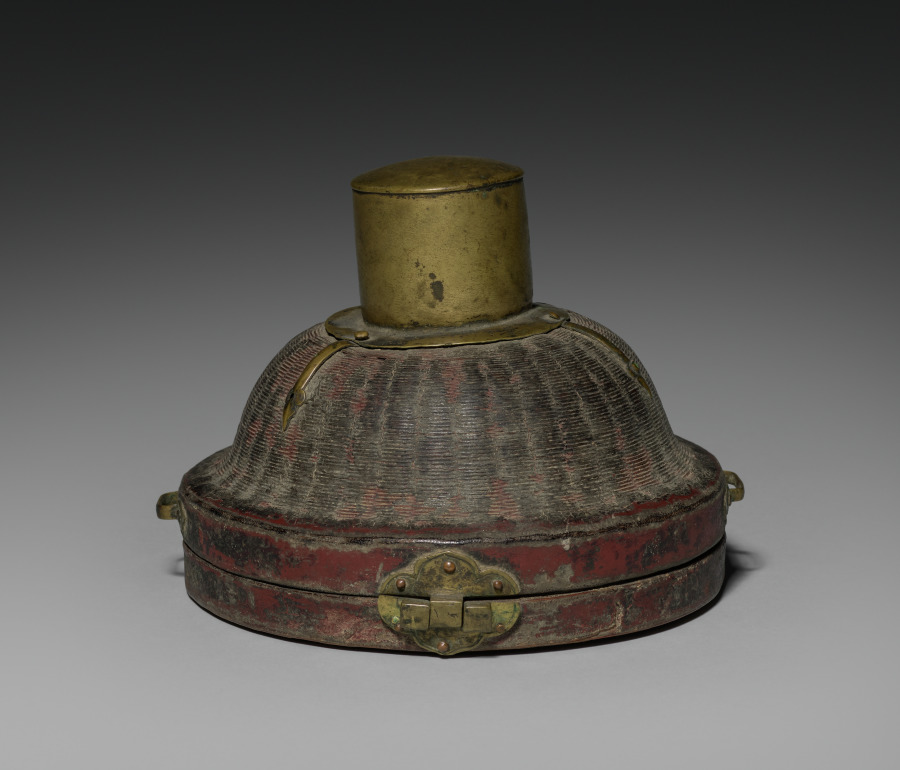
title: Stem Cup with Buddhist Emblems (case)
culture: China, Yuan dynasty (1271-1368)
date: 1300s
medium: wicker and wood with metal fittings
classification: Miscellaneous